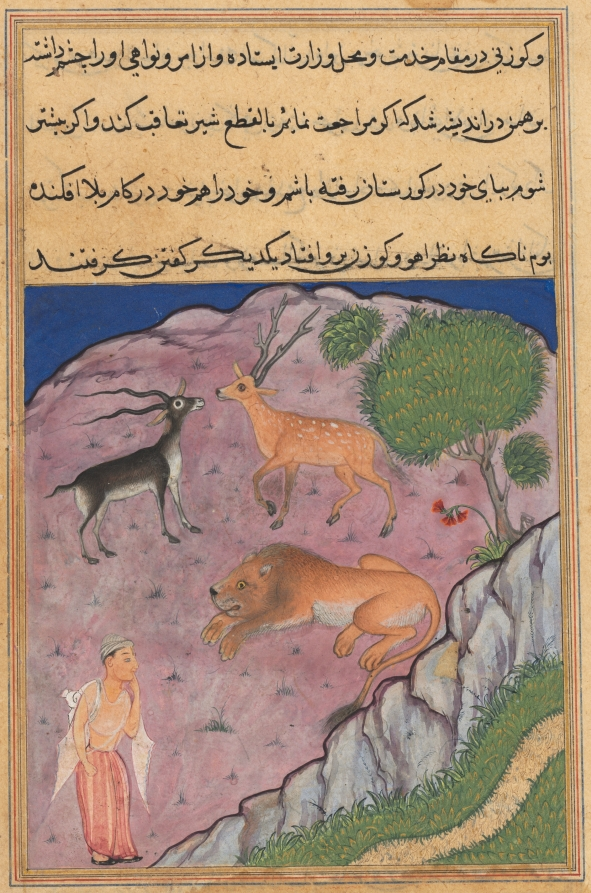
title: The Brahman comes upon a lion who has a deer and a gazelle as his viziers, from a Tuti-nama (Tales of a Parrot): Twenty-first Night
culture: Mughal India, court of Akbar (reigned 1556–1605)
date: c. 1560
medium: gum tempera, ink, and gold on paper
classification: Painting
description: On the left, the wary Brahman approaches the great lion, who rests on the banks of a river. Before the lion can attack, the deer and the gazelle step in and council him to receive the Brahman kindly. The Brahman has wandered into the wilderness after losing all of his wealth, but the lion gifts him an immense treasure.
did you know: The Brahman has a mark on his forehead identifying him as a worshipper of the Hindu god Vishnu.